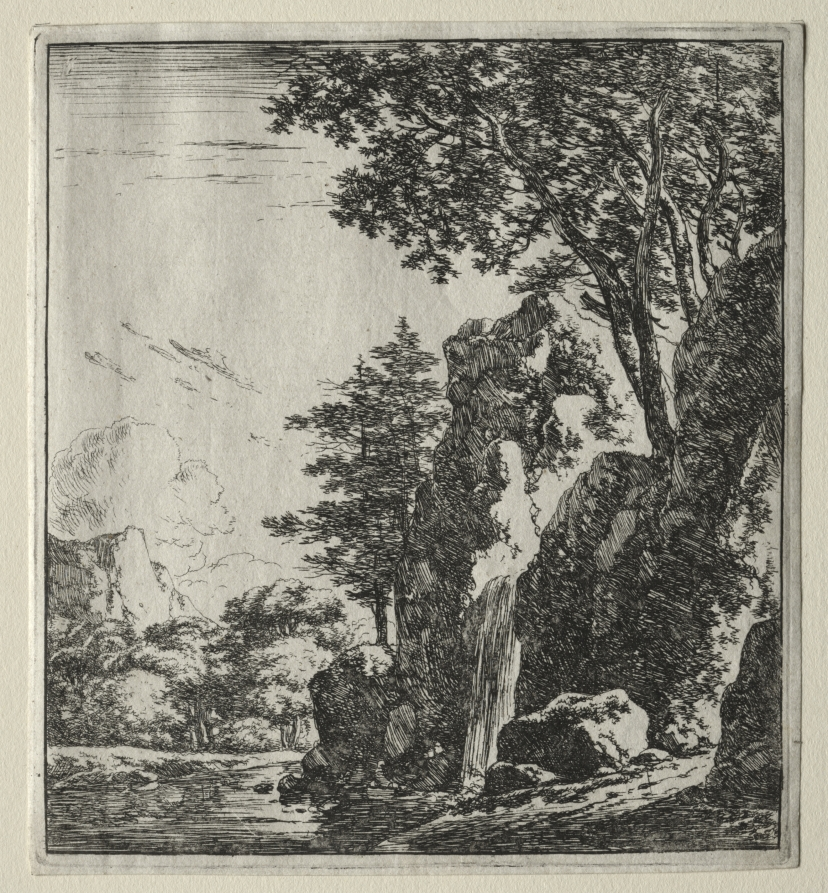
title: La chute d'eau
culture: Flanders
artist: Herman Naiwincx (Flemish, c. 1624–after 1651)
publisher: Clement de Jonghe (Dutch, 1579–1679)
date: 1640–51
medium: engraving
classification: Print